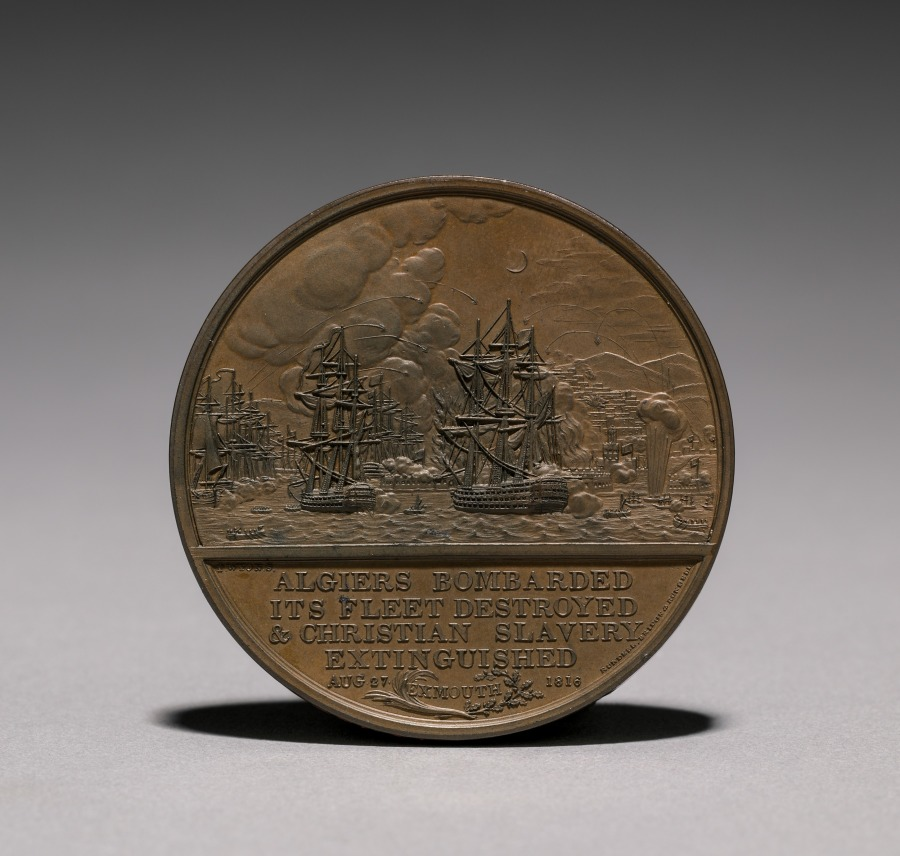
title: Medal: George, Prince Regent (reverse)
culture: England, 18th century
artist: Thomas Wyon Jr. (British, 1792–1817)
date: 1816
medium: bronze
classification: Metalwork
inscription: Algiers bombarded. Its fleet destroyed and Christian slavery extinguished Aug. 17 Exmouth 1816.